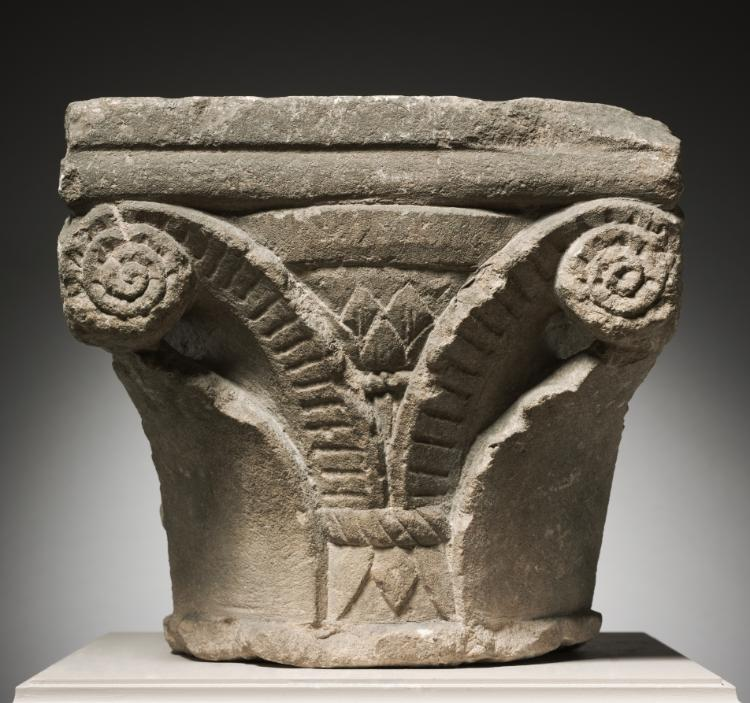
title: Capital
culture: Italy, Migration period, 8th-9th Century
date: 700s-800s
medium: marble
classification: Sculpture